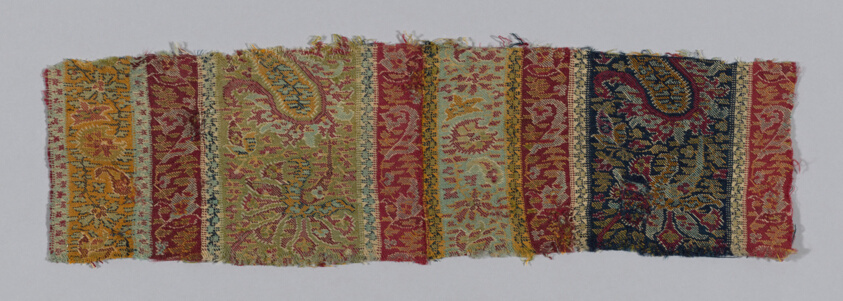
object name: Textile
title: Fragment (From a shawl)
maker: Iran (Persia)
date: 1800/50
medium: Weaving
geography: Iran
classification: textile; weaving